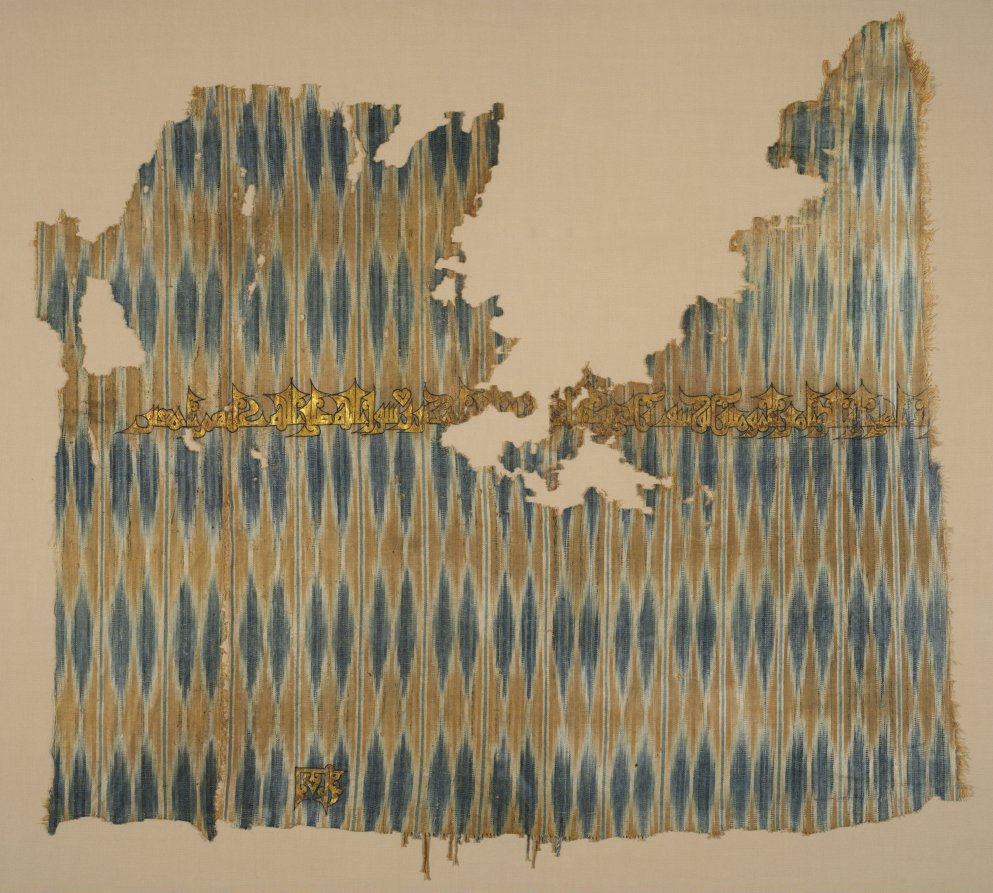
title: Ikat tiraz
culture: Yemen, San'a', Zaydi Imam period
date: 960–80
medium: resist-dyed warp (ikat); plain weave with inscription: cotton and gold leaf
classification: Textile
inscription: Kufic inscription, translated as: ". . . [a]l-Dá'i ilá al-Haqq, Commander of the Believers, Yusuf b. Yahya b. al-Nasir li-Din Allah Ahmad, son of the apostle of God, may God bless them all." At the bottom, the word "to God" is inverted. "Yusuf ibn Yahya" ruled AD 968-998)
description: The "flame" pattern was dyed on the vertical warp threads before weaving began by tightly binding them to resist dye penetration, and repeated for each color. The process and fabric are called ikat, a Malaysian word which may have originated in South Arabia. Yemeni ikats with historical Arabic inscriptions from the 10th century are among the oldest known. This text, written in Kufic script with gold leaf outlined in black, identifies a ruler of the Yemen: ". . . [a]l-Da’i ila al-Haqq, Commander of the Believers, Yusuf b. Yahya b. al-Nasir li-Din Allah Ahmad, son of the apostle of God, may God bless the all." The Arabic phrase "to God" is inverted at the bottom.